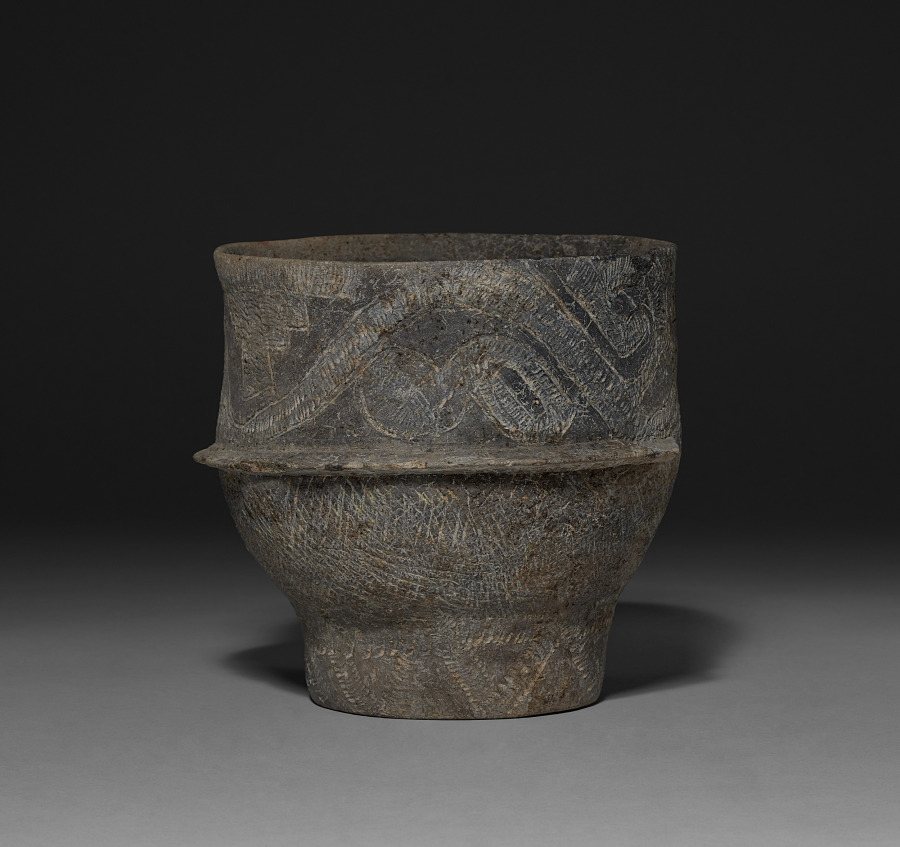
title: Jar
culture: Thailand, Ban Chiang, Neolithic Period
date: early 3000s BCE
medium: gray earthenware with incised decoration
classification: Ceramic